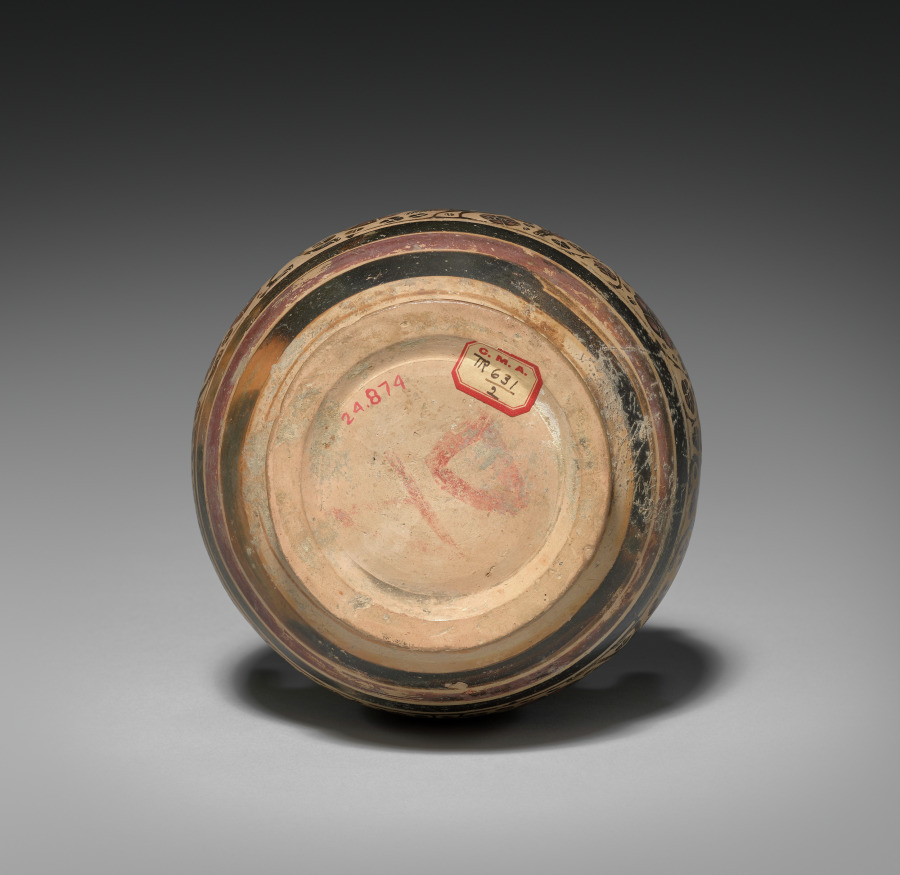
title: Corinthian Vase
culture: Greece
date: 600s BCE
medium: earthenware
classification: Ceramic